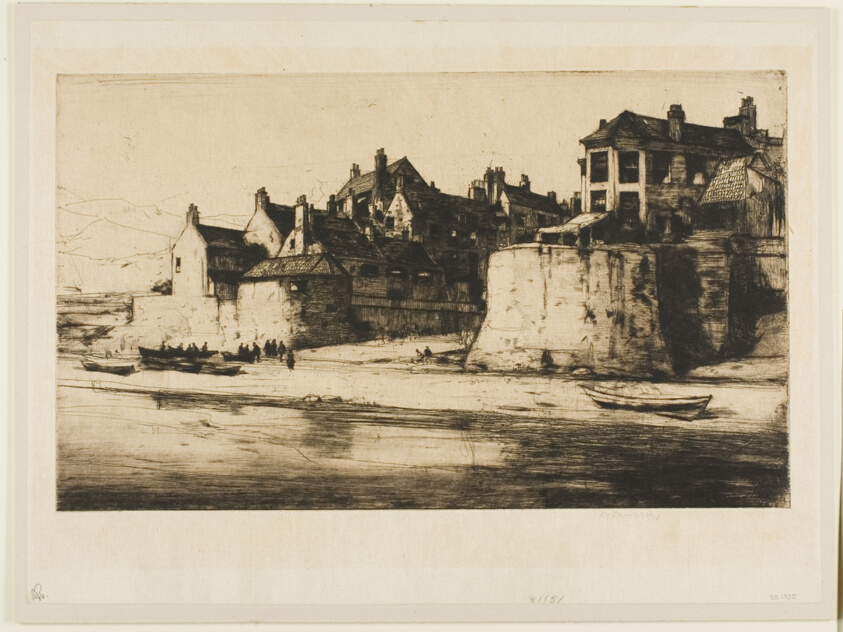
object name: Print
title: Robin Hood's Bay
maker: David Young Cameron (Scottish, 1865-1945)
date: 1907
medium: Etching and drypoint on buff laid paper, laid down on buff board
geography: Scotland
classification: drypoint; print; prints and drawing